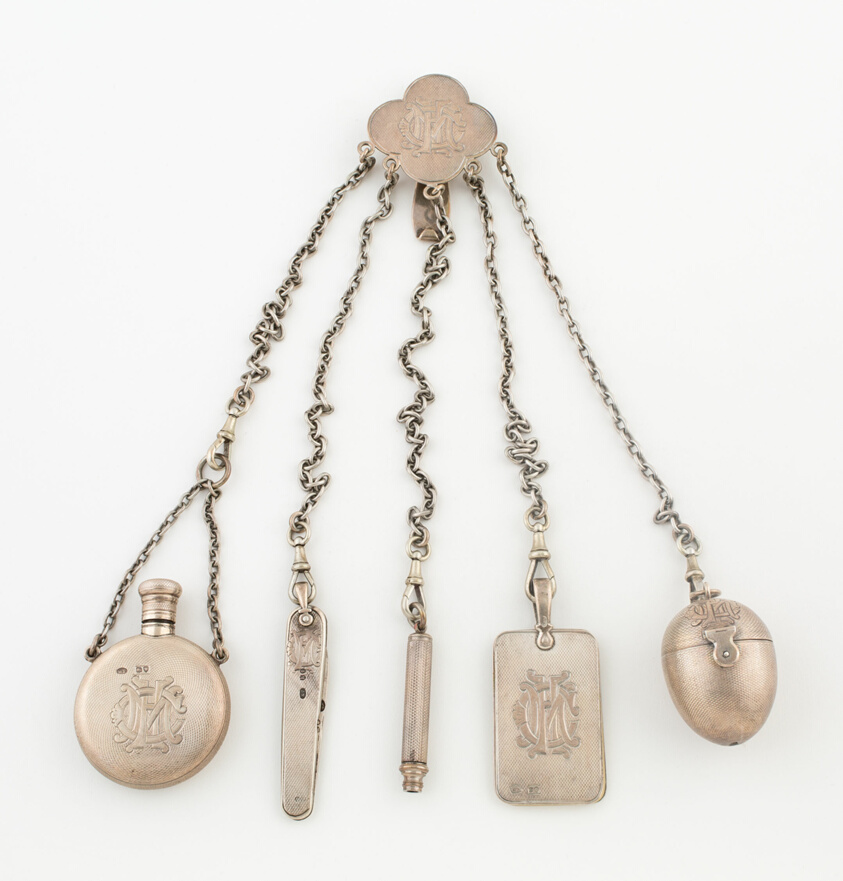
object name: Metalwork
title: Chatelaine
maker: London, England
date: 1882/86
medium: Silver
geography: London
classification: chatelaine; costume accessory worn at waist or below; costume accessory; european decorative arts; metalwork; silver; decorative object/ornament